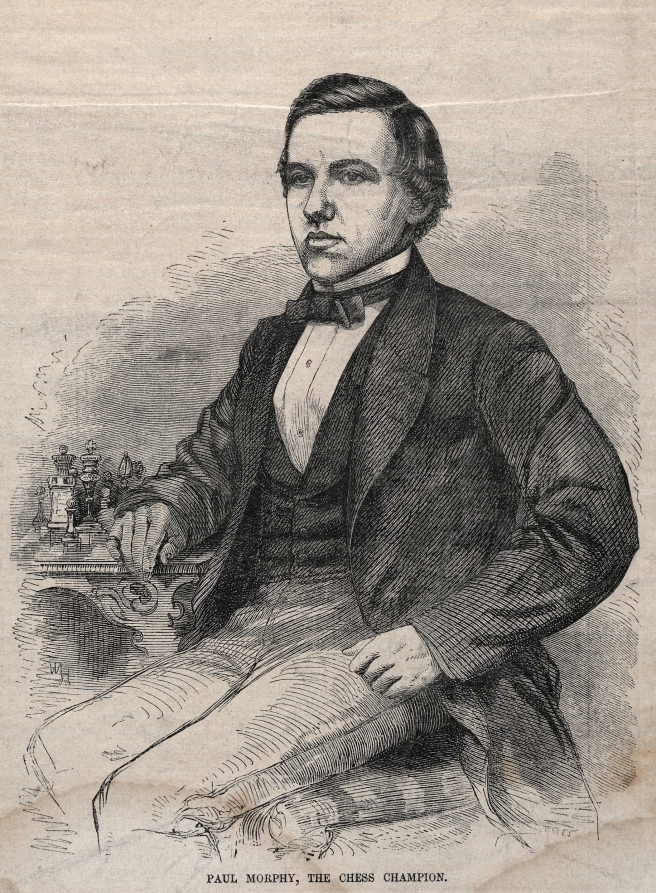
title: Paul Morphy, The Chess Champion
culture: America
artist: Winslow Homer (American, 1836–1910)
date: 1859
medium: wood engraving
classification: Print